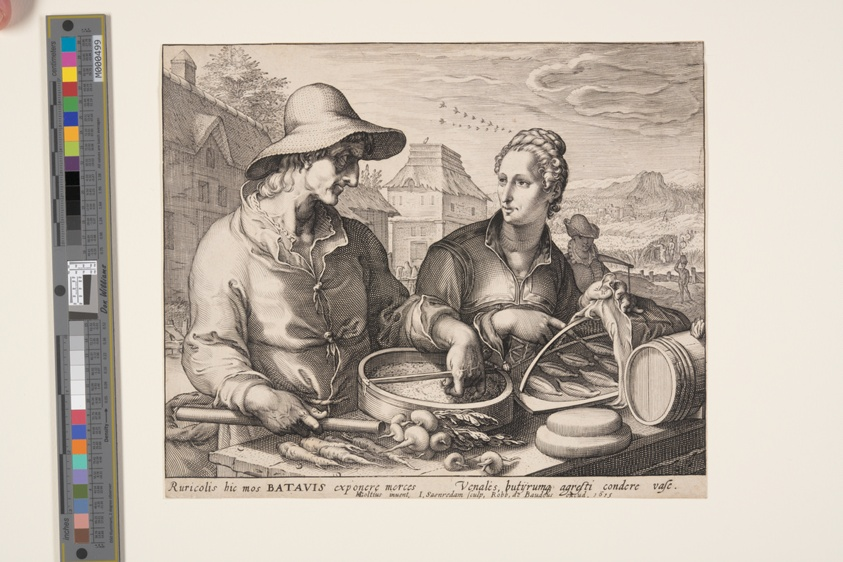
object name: Print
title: Farmer and His Wife at Market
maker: Jan Saenredam (Dutch, 1565–1607); after Hendrick Goltzius (Dutch, 1558–1617)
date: 1615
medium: Engraving on laid paper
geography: Netherlands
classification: print; engraving; paper; prints and drawing